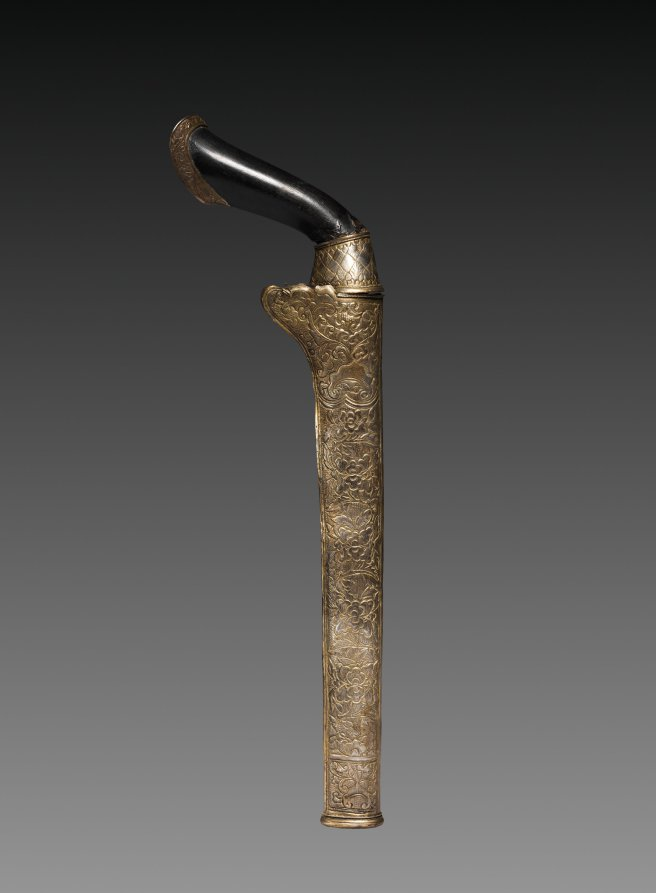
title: Knife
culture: Sumatra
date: 1500s–1800s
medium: Blade: damascened steel; handle: wood, bronze, and gilt silver fittings; scabbard: gilt silver with wood core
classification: Arms and Armor